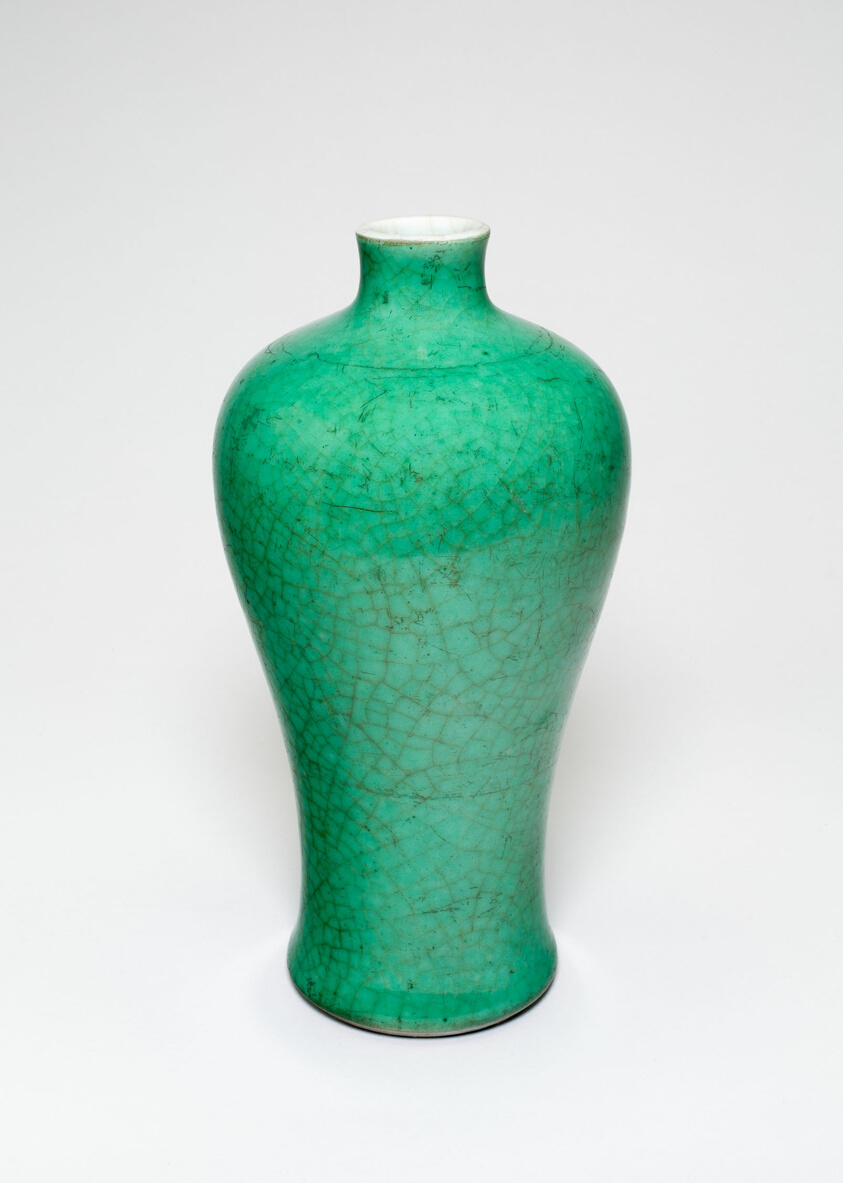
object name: Vessel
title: Balustrade-Shaped Vase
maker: China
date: Qing dynasty (1644–1911), Qianlong period (1736–1795)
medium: Porcelain with green crackled glaze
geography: China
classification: porcelain; asian art; ceramics